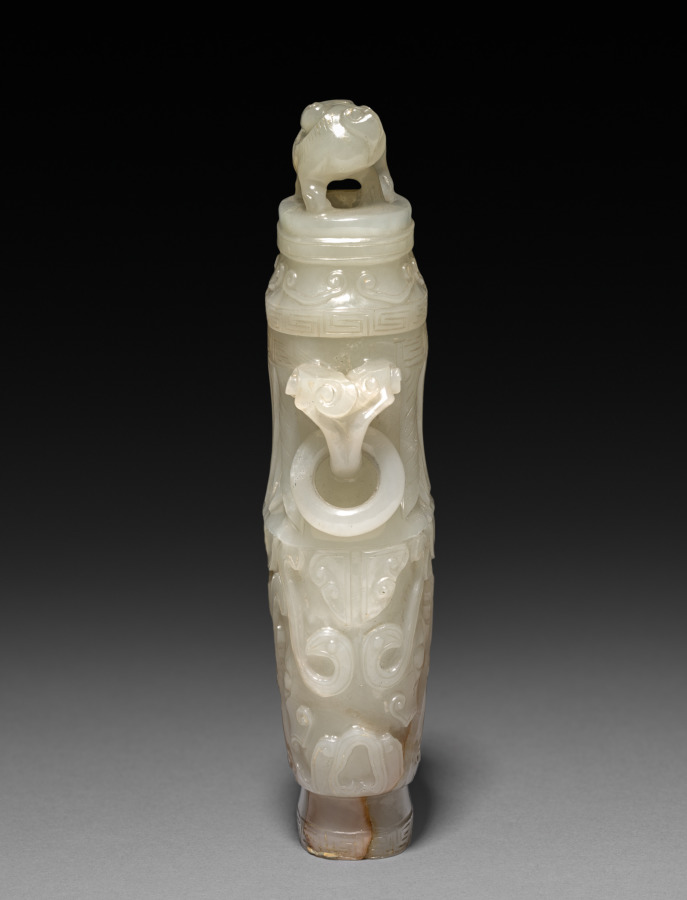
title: Jar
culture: China, Qing dynasty (1644-1911)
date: 1644–1911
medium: jade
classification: Jade